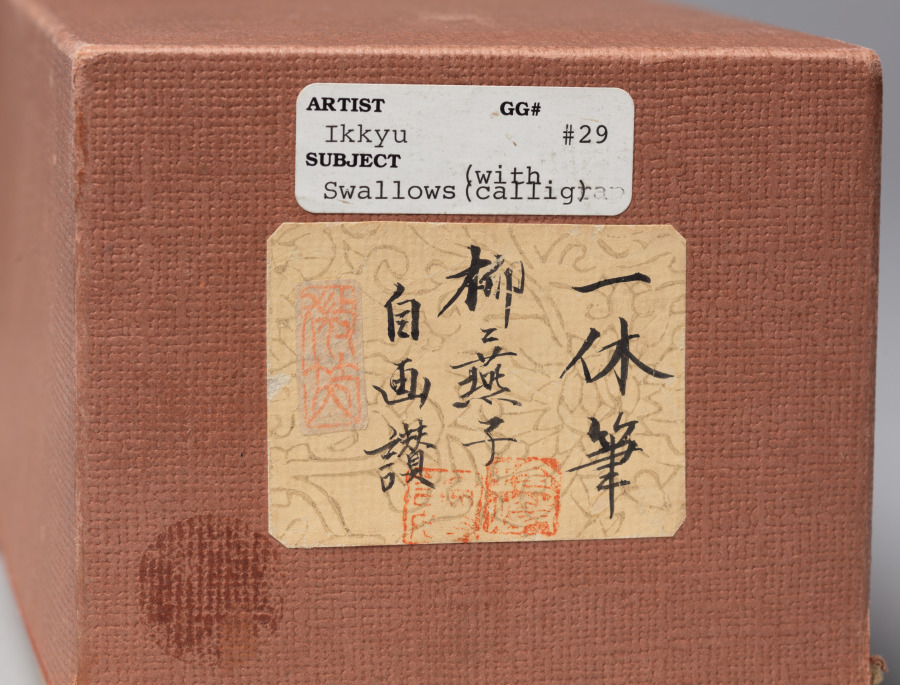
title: Calligraphy with Willow and Swallows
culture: Japan, Muromachi period (1392–1573)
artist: Ikkyū Sōjun (Japanese, 1394–1481)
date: 1400s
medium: hanging scroll, ink on paper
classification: Painting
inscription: How many days has it rid itself of the crow’s cloth? It knows not!/ Lovely is its body so nimble and neat./ Neither men of wealth, courtly position, or power can come close to the unfettered, noble swallow!/ With the coming of spring, it seems to be flying about, dancing around the grass hut of the foolish Priest. signed: Unkasō Isshi Tōkai jun Ikkyū shi ga ippitsu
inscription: outer box inscribed: Ikkyū Ōshō Enshi-zu Jigasan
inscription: inner box side lid inscribed: Showa 50 (1975), November by Tayama Honan with kao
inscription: Inner box side lid inscribed: Ikkyū Ōshō Bokuseki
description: The famed Buddhist monk Ikkyū is best remembered for his calligraphy. Calligraphic conventions of his time called for brushwork that did not vary much in style from character to character. However, as Ikkyū’s lines progress, his brushwork wanders between standard script and a sort of shorthand, marked by an uneven distribution of ink and a reduction of the characters to only the most necessary strokes. Ikkyū’s direct communication of emotion via brushwork became characteristic of the works produced by monks affiliated with the temple Daitokuji later in the Edo period (1615–1868).